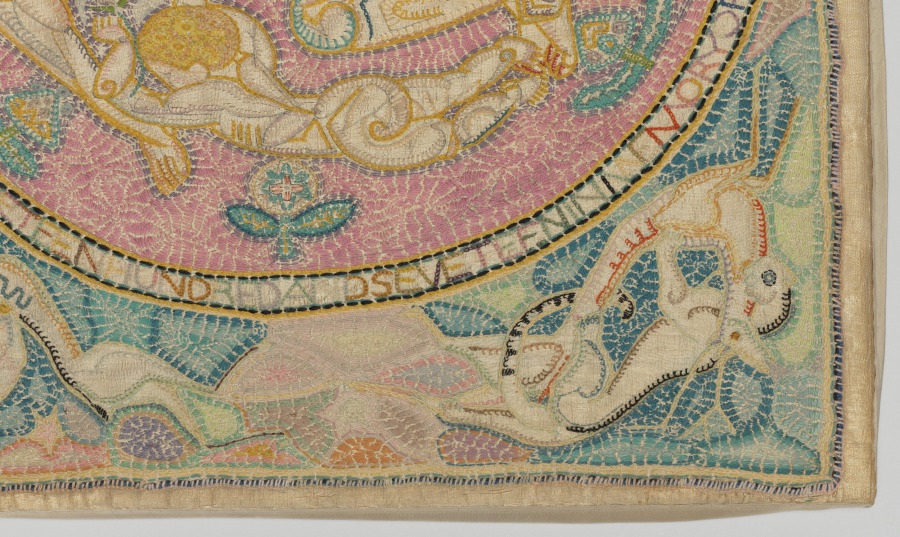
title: The Family (In Memory of a Summer in the White Mountains)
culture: America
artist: Marguerite Zorach (American, 1887–1968)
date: 1917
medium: plain weave silk; wool embroidery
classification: Embroidery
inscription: THE FAMILY / DONE BY MARGUERITE ZORACH IN THE YEAR NINETEEN HUNDRED AND SEVENTEEN IN MEMORY OF A SUMMER IN THE WHITE MOUNTAINS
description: Marguerite Zorach conceived her large, complex embroideries as major artistic statements at a time when the medium was routinely considered “craft,” as opposed to “fine art.” In doing so, she helped to erase such distinctions. One of her most acclaimed works, this example celebrates humanity in harmony with nature, presenting the artist, her husband (a Cleveland-raised sculptor named William Zorach), and their son amid an evergreen tree and four pairs of animals. Very time consuming to create, Zorach’s embroideries are rare.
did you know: In 1925, Zorach served as first president of the New York Society of Women Artists, an organization still in existence.